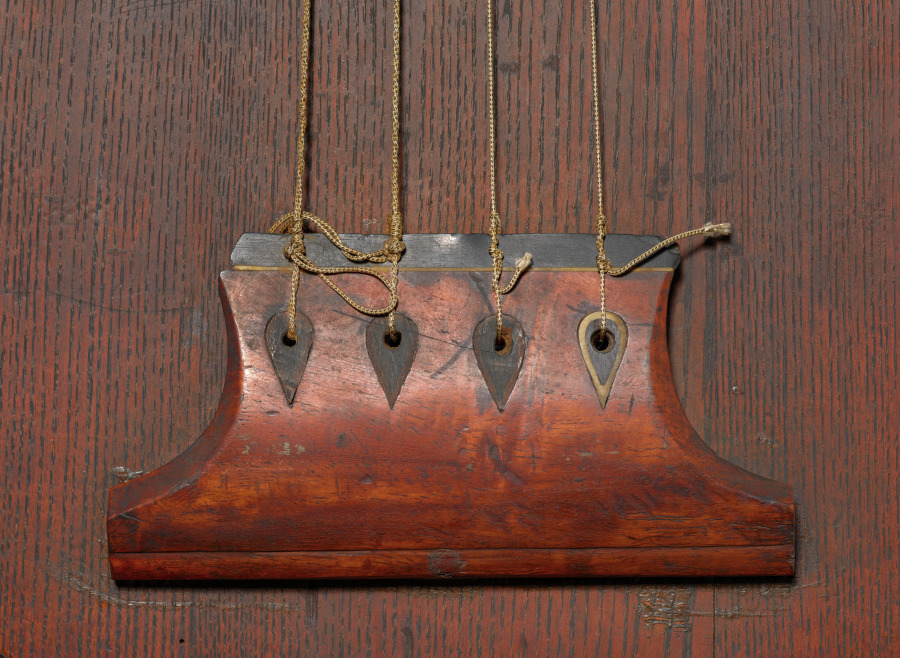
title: Heike Biwa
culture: Japan, Meiji period (1868–1912)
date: c. 1850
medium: Wood, bone, silk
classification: Musical Instrument